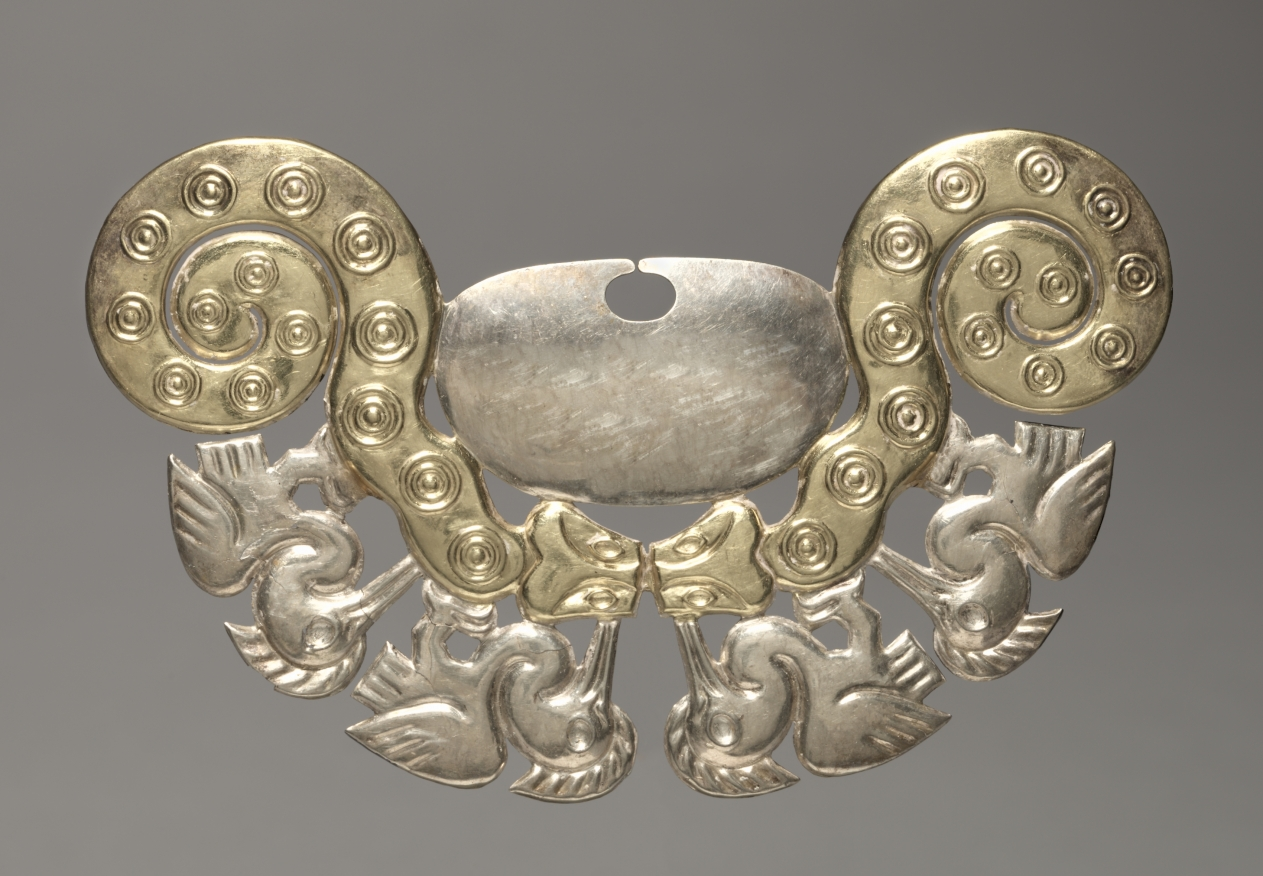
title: Nose Ornament with Serpents and Long-necked Birds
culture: Peru, North Coast, Moche culture (50–800 CE), early Intermediate Period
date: c. 100–300 CE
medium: gold alloy and silver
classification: Metalwork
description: A crucial element of Moche royal regalia was the nose ornament, whose imagery varies from benign to predatory. One ornament here depicts a human head, perhaps a ruler’s portrait, flanked by birds that attack human victims. In another, two supernatural decapitators brandish knives over a row of severed human heads. The third is an elegant composition that combines serpents with long-necked water birds. The Moche were among the Andes’ most inventive metalsmiths, and they developed many complex techniques for joining and enriching the surfaces of metals, which they usually worked by hammering rather than casting. The gold-and-silver ornaments were made by first joining gold and silver sheets through heating and hammering. Then came the relief decoration, followed by the selective removal of metal along the joins. Finally, the ornament was trimmed and polished.